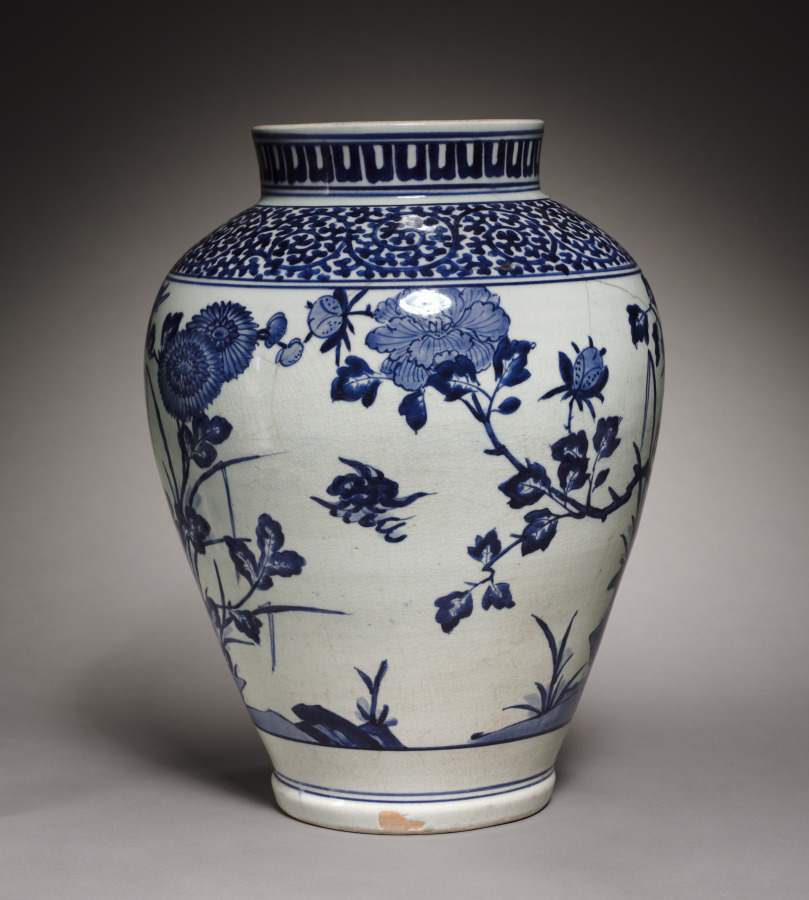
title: Large Jar with Peonies, Orchids, and Chrysanthemums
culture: Japan, Edo period (1615–1868)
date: late 1600s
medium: Porcelain with underglaze blue decoration (Imari ware)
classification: Ceramic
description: Spring peonies, summer orchids, and autumn chrysanthemums bloom at the same time amid garden rocks. These underglaze blue motifs were inspired by similar designs on Chinese ceramics made for export to Europe. In the early 1600s, Korean potters in Japan discovered kaolin, the clay essential for porcelain production. At the same time, political turmoil in China following the collapse of the Ming dynasty (1368–1644) disrupted Chinese exports. Together, these circumstances created an opportunity for Japan to supply ceramics to the European market. Careful study of Chinese prototypes shaped the work of Japanese ceramists for both domestic and overseas audiences.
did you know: This design shows the changing of the seasons: one side depicts a peony blossom in the spring, and the other side continues with chrysanthemums and an orchid in the autumn.